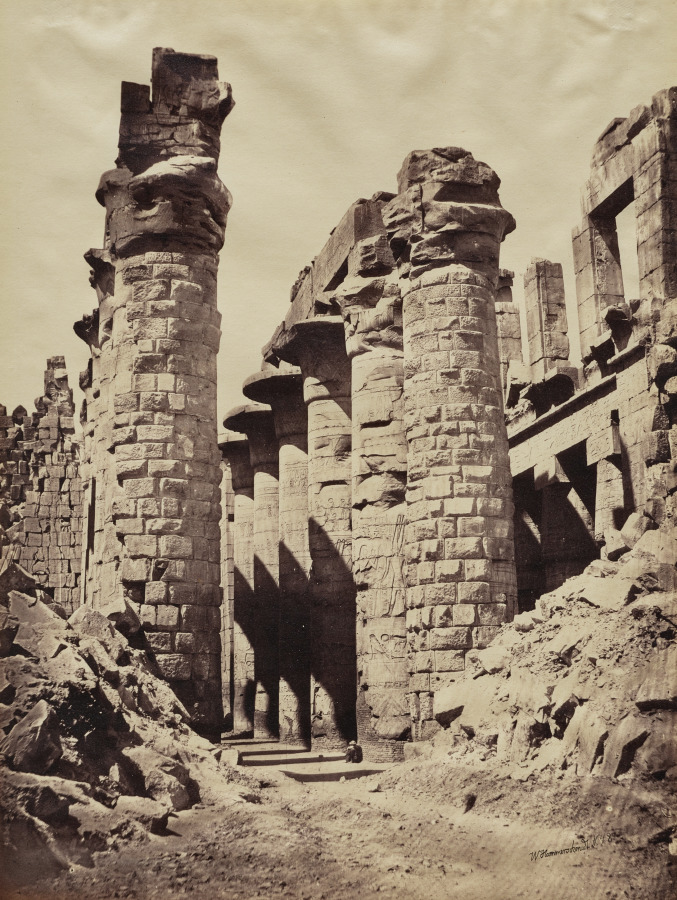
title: View of Karnak Temple, Hypostyle Hall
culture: Germany, 19th century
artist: Wilhelm Hammerschmidt (German, 1869)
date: c. 1880s-90s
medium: albumen print from wet collodion negative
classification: Photograph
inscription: Inscribed in black on recto: “W. Hammerschmidt N. 48"